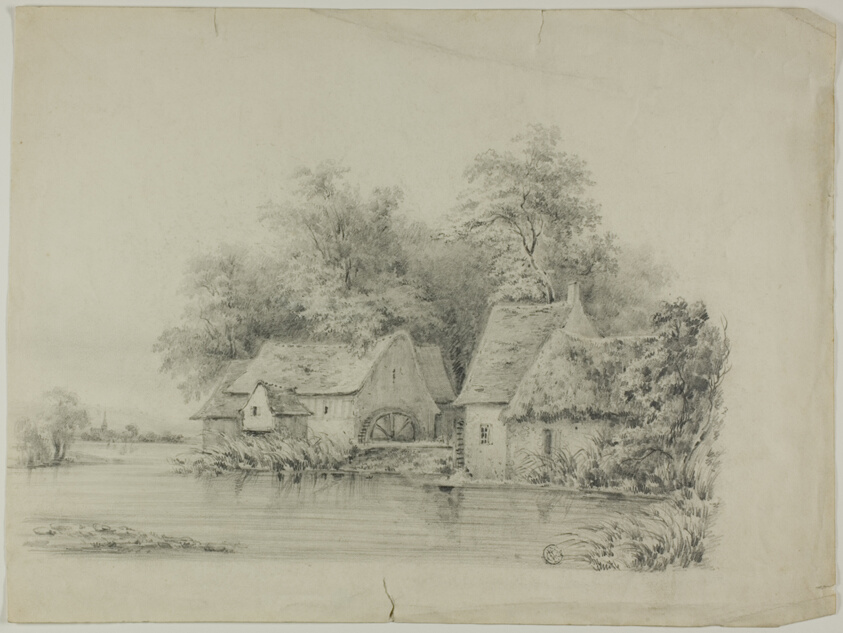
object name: Drawing and Watercolor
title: Watermill and Cottage with Thatched Roofs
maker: Unknown Artist; European, 17/18th century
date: 19th century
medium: Graphite on cream wove paper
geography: Europe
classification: graphite; drawings (visual works); prints and drawing